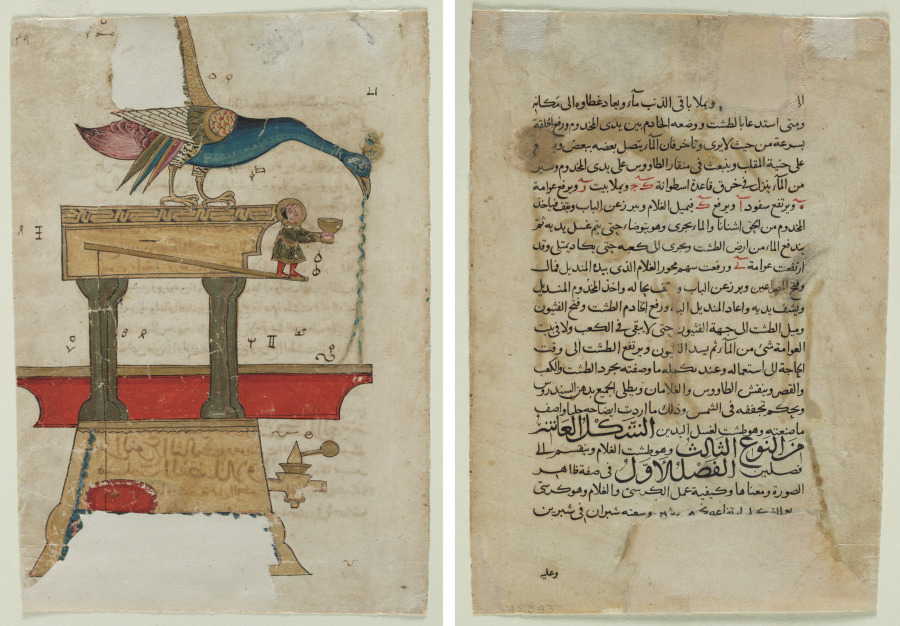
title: Peacock-shaped Hand Washing Device (recto); Text Page, Arabic Prose (verso)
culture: Syria, Damascus, Mamluk Period, 14th Century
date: 1315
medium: opaque watercolor and gold on paper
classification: Manuscript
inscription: verso script: Naskh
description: This leaf from a 1315 Syrian copy of Ibn al-Razzāz al-Jazarī’s The Book of Knowledge of Ingenious Mechanical Devices, written in 1206, depicts a peacock basin automaton for ritual hand washing. There are 15 surviving manuscript copies of al-Jazarī’s work, ranging from the early 13th to the late 19th century. An engineer from upper Mesopotamia, al-Jazarī was in the service of King Nasrī al-Dīn when he completed his masterwork, an anthology of automated devices including clocks, trick vessels for drinking sessions, devices for washing, fountains, water-raising machines, and measuring instruments. His designs clearly illustrate that automata were not innovations from Western Europe, but they stemmed from a tradition known in the ancient, Islamic, and Byzantine worlds. We do not know with certainty that al-Jazarī’s device was ever actually constructed.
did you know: The mouth of the peacock acts as a spigot pouring water; the figure emerged from a small door and offers soap to the hand washer.